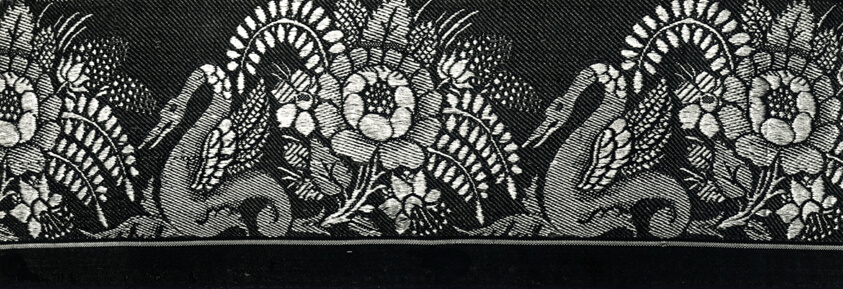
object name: Book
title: Sample Book of Dress Goods Swatches (Volume I)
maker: France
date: 1835/45 (page 35, page of woven border designs, 1804–1814)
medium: Total of swatches: 837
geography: France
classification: textile; book; sample books